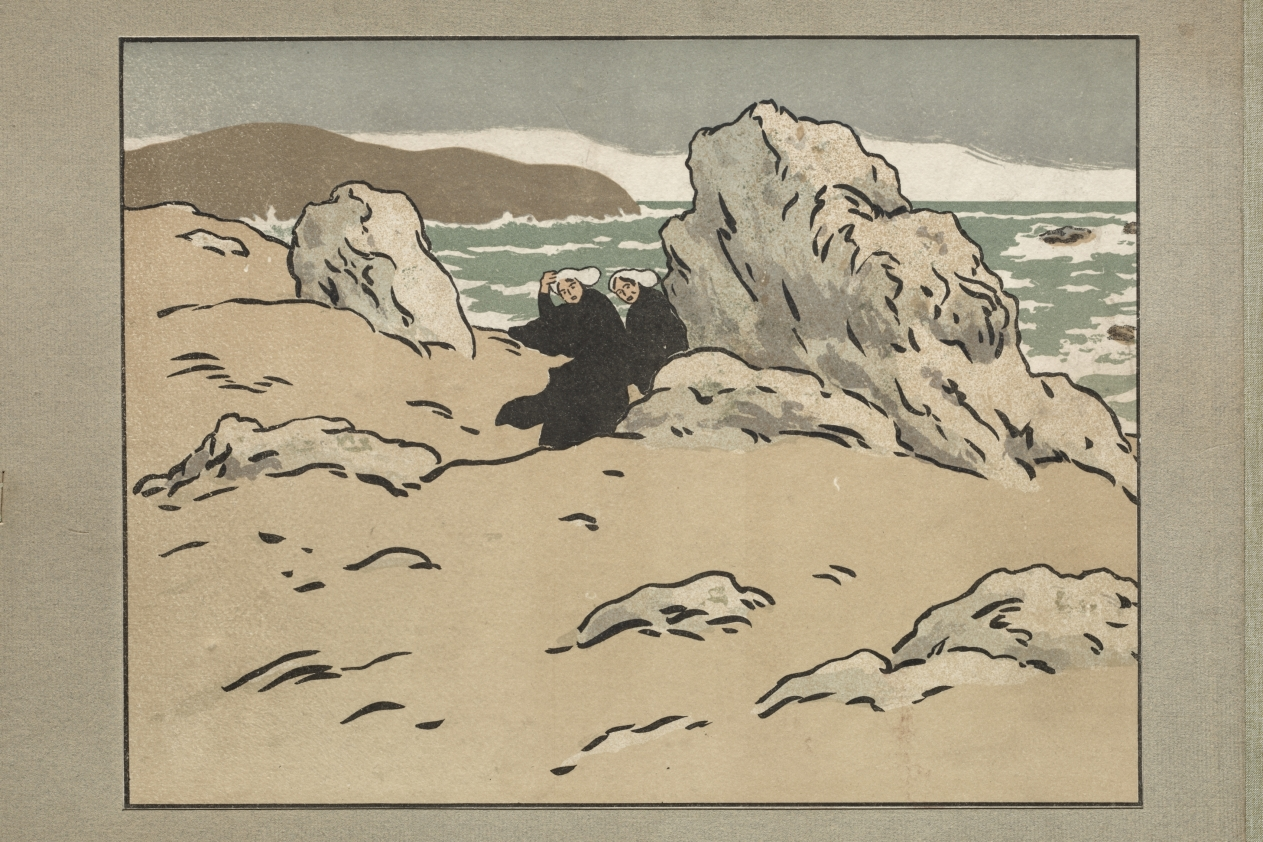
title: The Wandering Jew: The Modern City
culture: France, 19th century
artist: Henri Rivière (French, 1864–1951)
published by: Verneau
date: 1896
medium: color lithograph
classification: Portfolio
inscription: title page is signed, in blue crayon: Henri Rivière